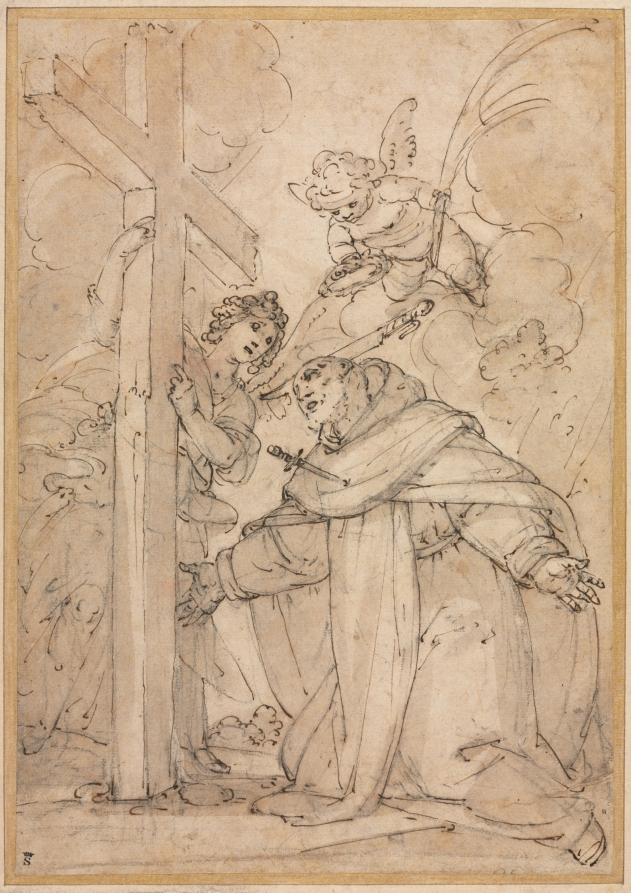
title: Saint Peter Martyr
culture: Italy, 16th century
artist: Giovanni Battista Paggi (Italian, 1554–1627)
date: late 1500s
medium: pen and brown ink and brush and brown wash over black chalk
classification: Drawing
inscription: RECTO OF SECONDARY SUPPORT, lower center, in brown ink: Ippolito Scarsellino . [Scarsellino underlined in graphite] ; lower center, in blue pencil: . 1551 ; lower center, in blue pencil: 1621 . ; lower right, in graphite: - voir au versò - ; VERSO OF SECONDARY SUPPORT, across top, in brown ink: Ippolito Scarsellino [underlined] da Ferrara [Ferrara underlined], figlio di Sigismondo Scarsella [Sigismondo Scarsella underlined] , excellete Disegnatore [illegible]. / morì L'anno 1620 ____ Orlandi [Orlandi underlined]; who, speaking of his Father, in this Article, & of the / fine works he left behind him in his own country of Ferrara [Ferrara underlined] ; says ___ L'opera più / bella che Lasciasse alla sua città fù il figlio Ippolito. [entire Italian phrase underlined]. A good Cavalier Expresion for / a monk! ; upper left, in graphite: 20ºº ; upper center, in blue pencil: # 46 ; upper right, in blue pencil: 20ºº ; upper left, in graphite(?): [illegible] ---- 10 [erased] ; upper left, in graphite: 74 [circled] ; center left, in graphite: 10 [sideways, erased] ; lower left, in graphite: OK-P . / 2 of Ma[r?] '61